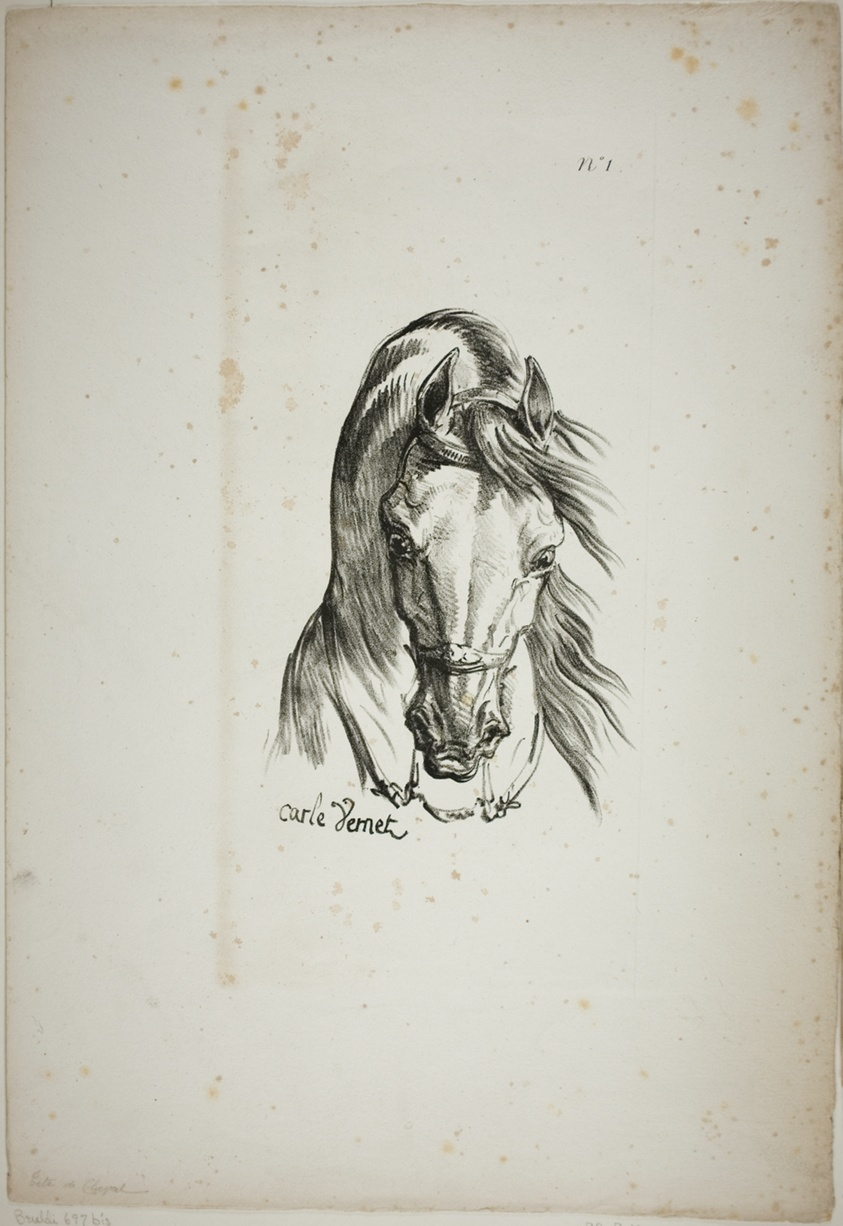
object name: Print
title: Detail of Horse's Head, Enlarged to Triple Size, Norman Royal Guard, No. 1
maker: Carle Vernet (French, 1758-1836); printed by Comte de Charles Philibert Lasteyrie du Saillant (French, 1759-1849)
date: c. 1818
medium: Lithograph in black on ivory wove paper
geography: France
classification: lithograph; print; prints and drawing